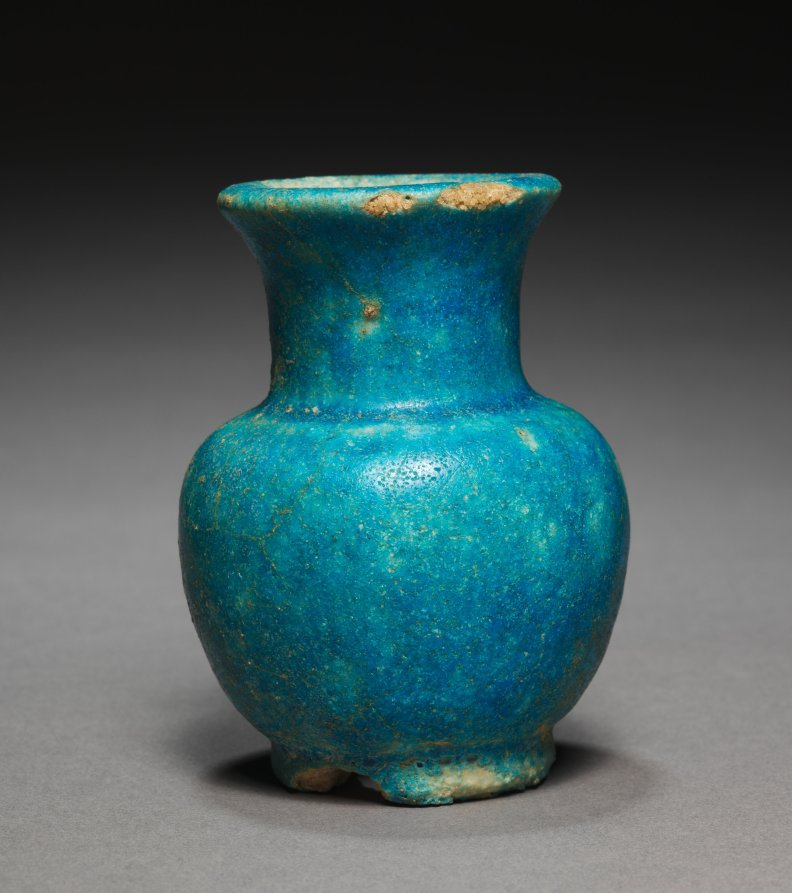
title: Jar with Tall Neck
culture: Egypt, Greco-Roman period (332 BCE–395 CE), Roman empire (30 BCE–395 CE)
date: 30 BCE–395 CE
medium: blue faience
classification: Vessels